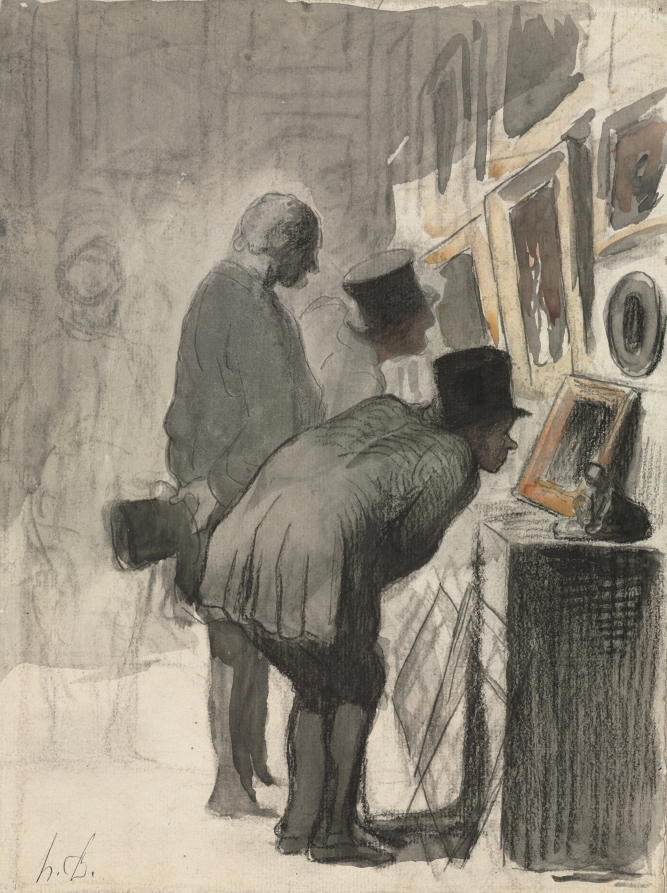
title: Art Lovers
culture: France, 19th century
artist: Honoré Daumier (French, 1808–1879)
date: c. 1863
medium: Gray and black wash, charcoal, and graphite, with watercolor, on cream laid paper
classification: Drawing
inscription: signed, lower left, in black ink: h.D.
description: Honoré Daumier was known for his witty depictions of contemporary Parisian types, including the art collectors seen in this drawing. The sheet belongs to a series in which the artist depicted these connoisseurs in the process of closely studying works of art. Although here, the men's focus seems sincere, in many works Daumier caricatured his subjects' greediness, smugness, or obliviousness.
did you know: Honoré Daumier produced watercolors primarily for collectors of his work, suggesting that this image, somewhat ironically, was intended to be sold to the very figures it depicts.